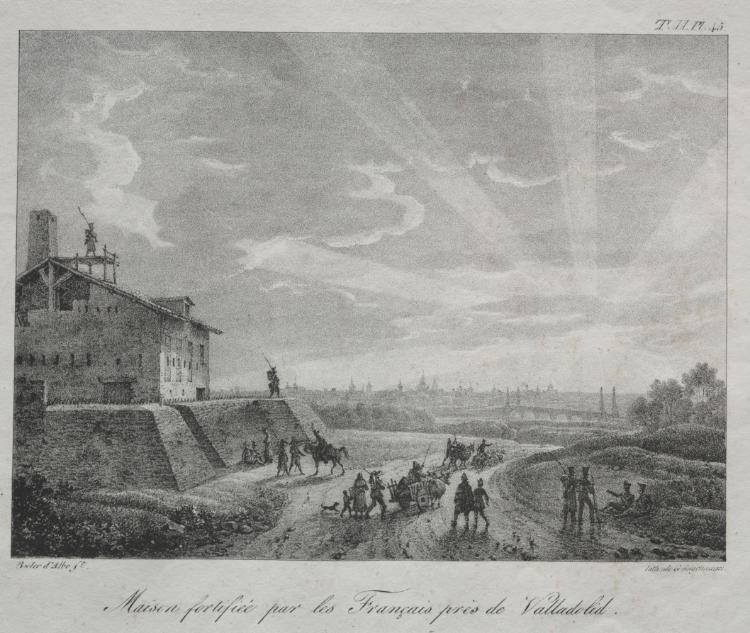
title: Spanish Campaign: A Building Fortified by the French near Valladolid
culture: France, late 18th-early 19th century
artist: Baron Louis Albert Guillain Bacler d'Alber (French, 1761–1824)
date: 1807–24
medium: lithograph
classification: Print